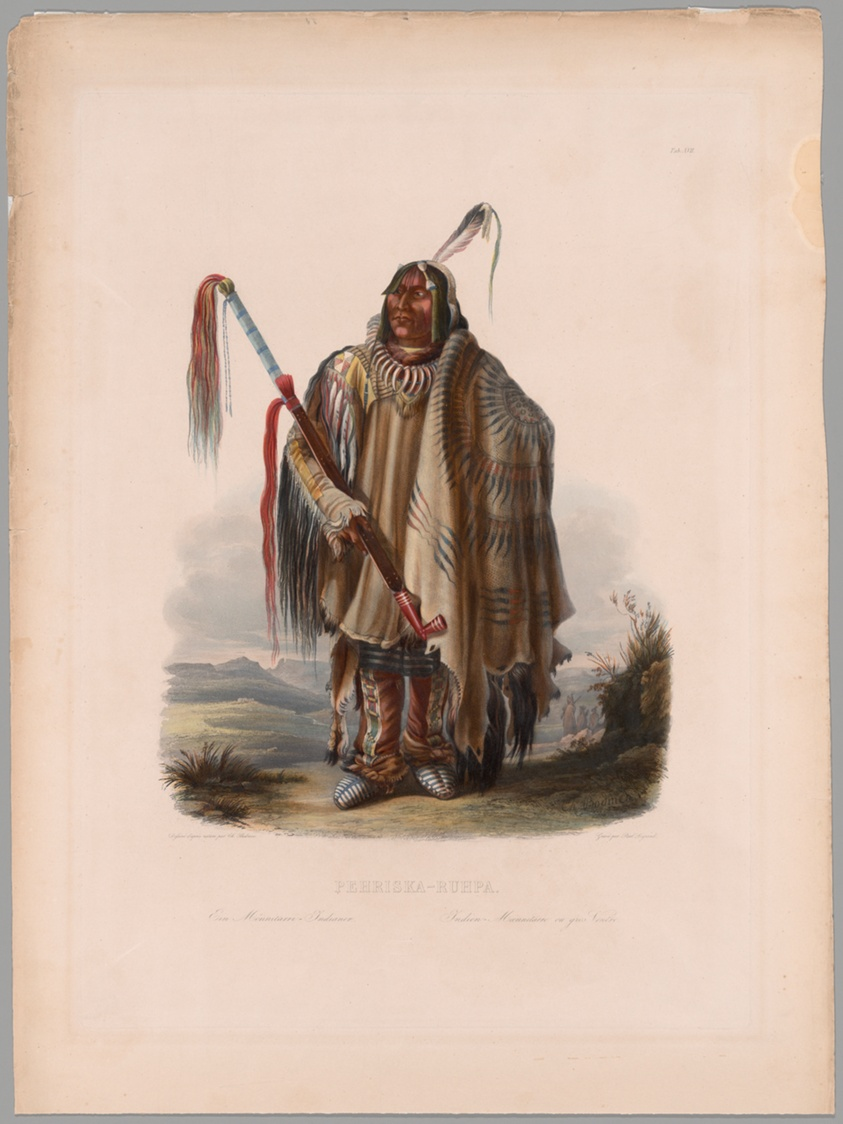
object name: Print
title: Pehriska-Ruhpa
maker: Paul Legrand (French, active 1819-1944); after Karl Bodmer (Swiss, 1809-1893)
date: 1840/44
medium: Hand-colored etching and aquatint, with selective glazing, on ivory wove paper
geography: France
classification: print; paper; prints and drawing; aquatint; etching